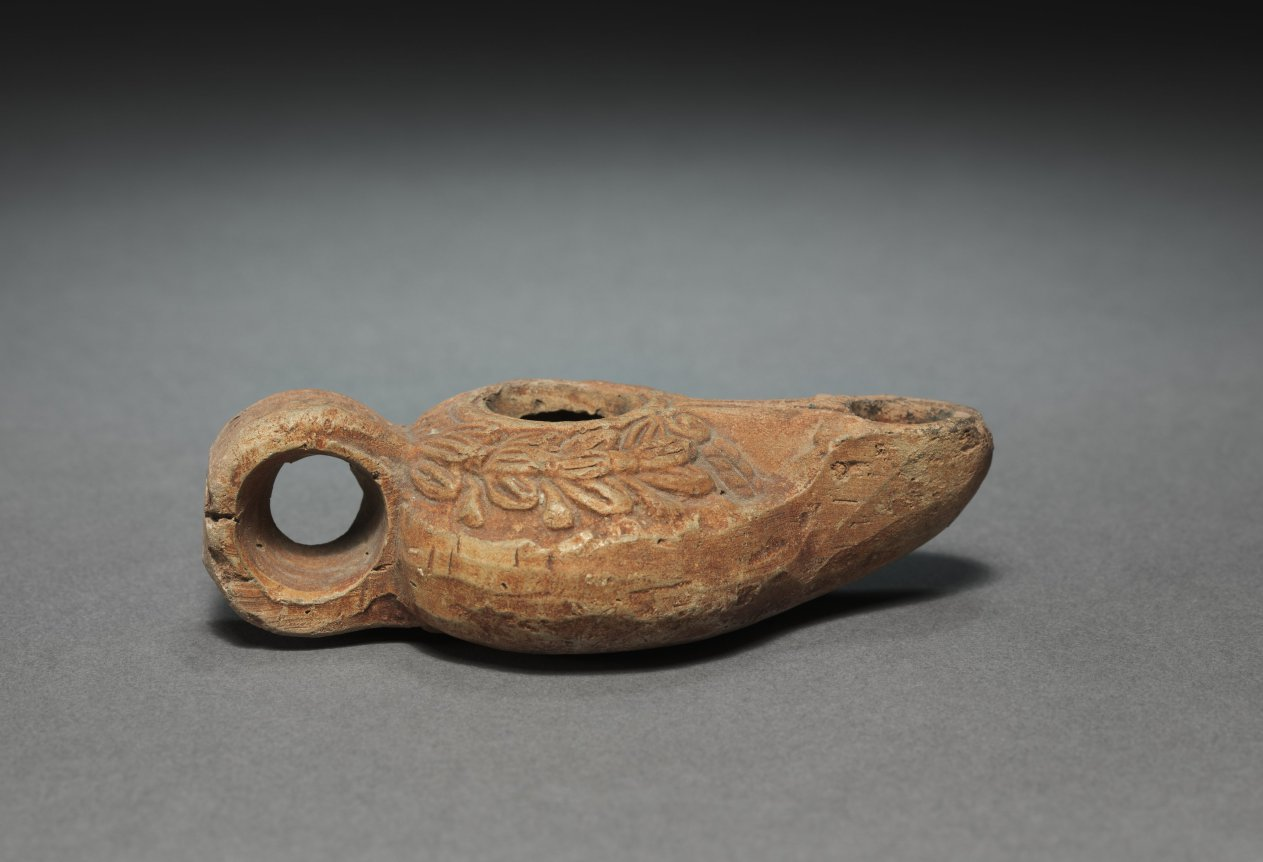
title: Lamp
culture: Parthian Empire (247 BCE–224 CE)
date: 1–200 CE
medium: terracotta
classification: Ceramic